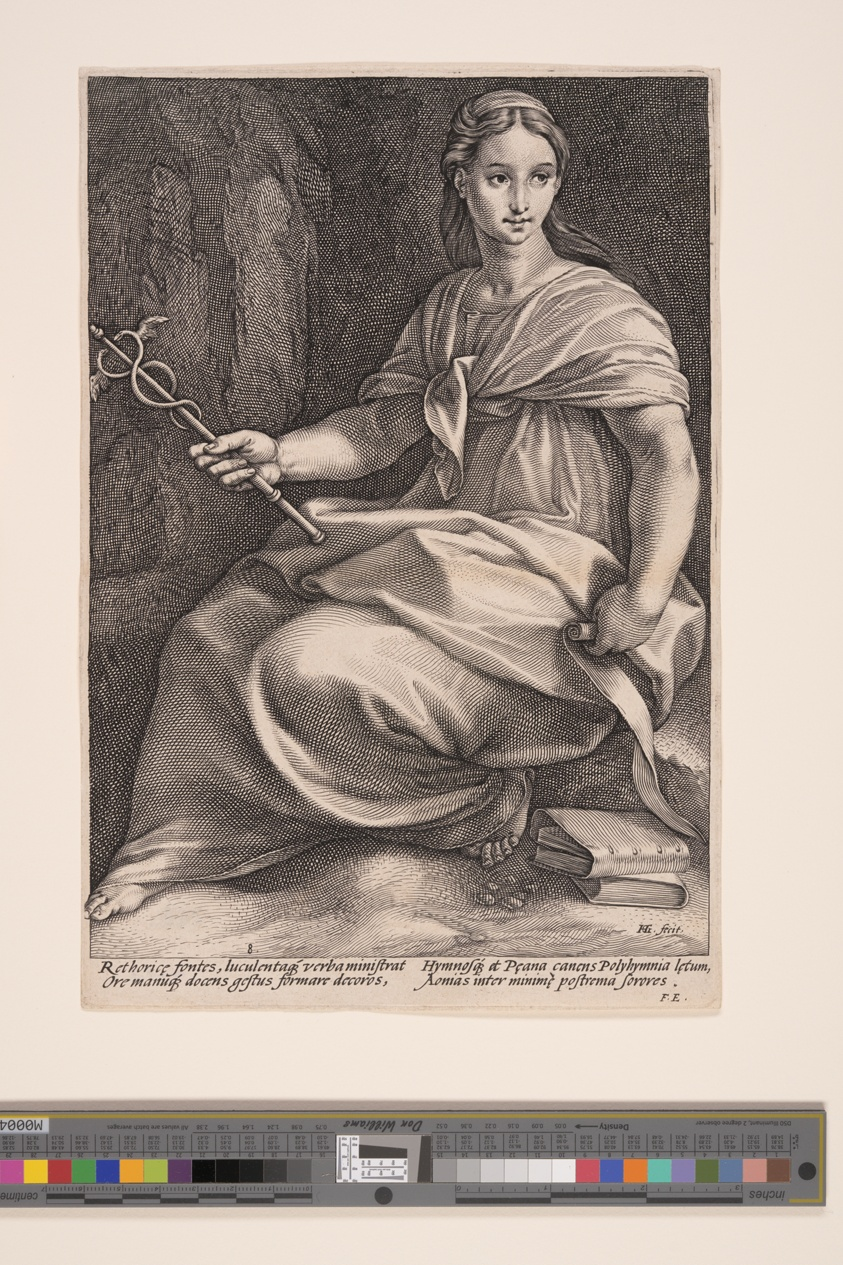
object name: Print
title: Polyhymnia, The Muse of Choral Poetry, from The Nine Muses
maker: Hendrick Goltzius (Dutch, 1558–1617)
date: 1592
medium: Engraving on laid paper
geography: Netherlands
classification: print; engraving; paper; prints and drawing